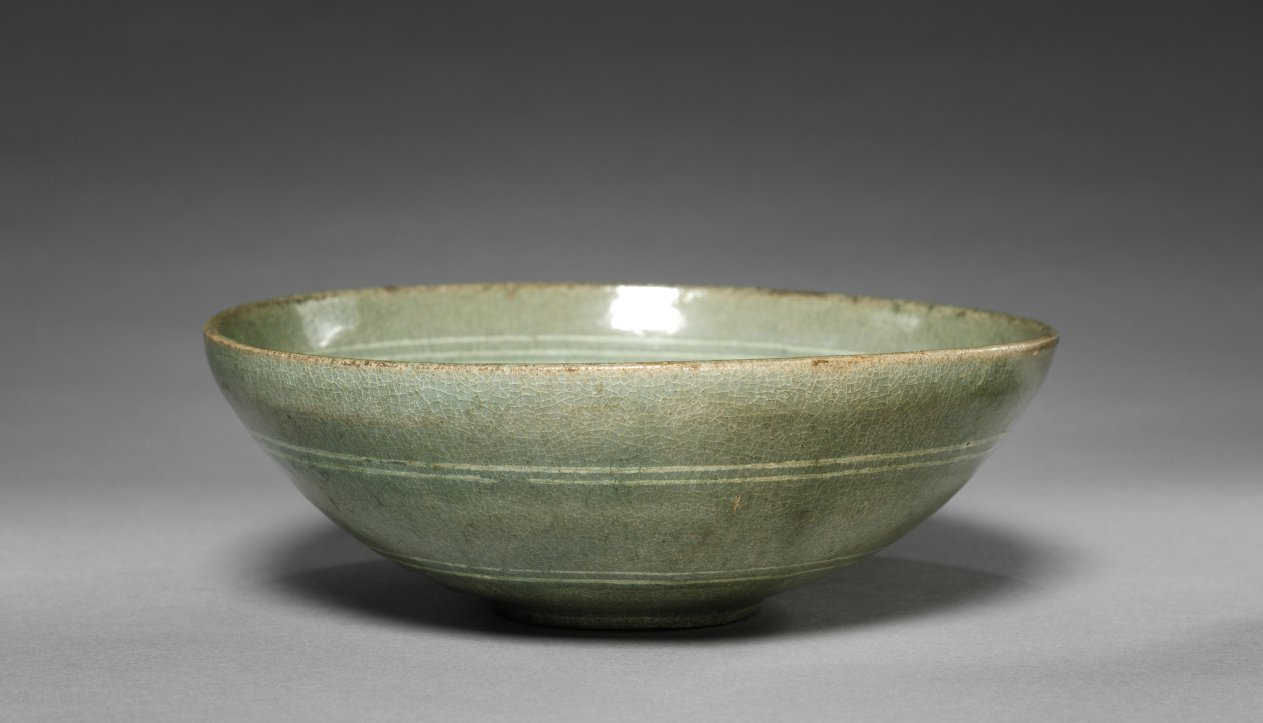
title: Dish with Inlaid Plant Design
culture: Korea, Goryeo dynasty (918–1392)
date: 1300s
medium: celadon with inlaid design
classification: Ceramic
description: As early as the 600s, the practice of drinking tea and wine became an important part of elite leisure culture in Korea. A wide bowl like this example was especially suitable for drinking powdered tea shaved from a compressed tea cake, the most commonly enjoyed type during the Goryeo period. The inlaid image of bloomed white flowers on the inner wall of this tea bowl must have made the moment of drinking tea more enjoyable.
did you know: The transparent greenish and bluish glaze of Goryeo celadons, shown in this bowl, is the result of distinctive small and long Korean kilns, which maintained a low oxygen saturation with a high level of carbon dioxide.